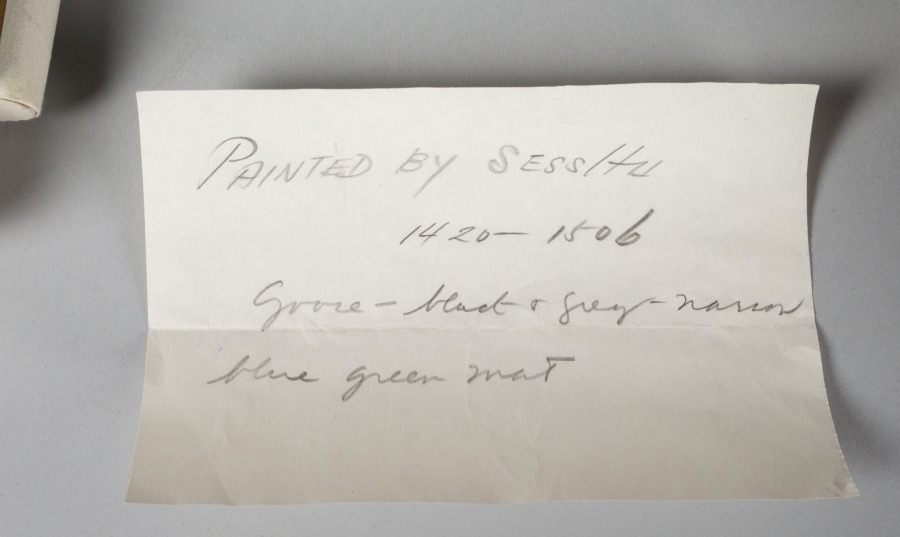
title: Goose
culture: Japan, Edo period (1615–1868)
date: c. 1615–99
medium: hanging scroll; ink on paper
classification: Painting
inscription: spurious seal of Sesshu, lower right.